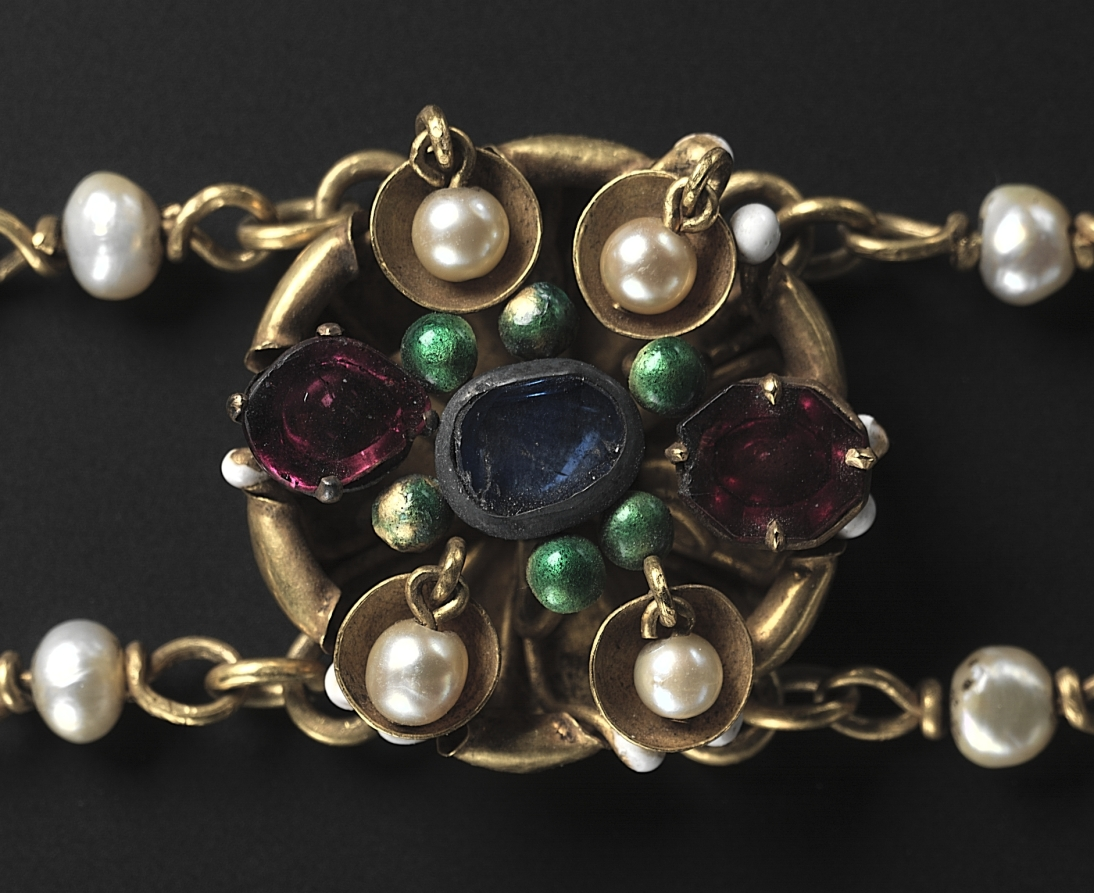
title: Twelve Medallions Mounted as a Necklace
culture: France, Paris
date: c. 1400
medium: enameled gold, precious stones, and pearls; some later additions with modern chain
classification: Jewelry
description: These medallions, which have loops on the backs, must have originally been sewn onto a garment or, more likely, a woman’s headpiece. In spite of the modern chain to which they are now attached, the medallions are unique items of feminine apparel from around 1400. Such items would have been well known at the courts of the Valois in Paris, Bourges, and Dijon. The central medallion with a “white lady” is enameled “in the round”––a new Parisian technique for enameling irregular or three-dimensional surfaces. Such white lady medallions are described in inventories of the period